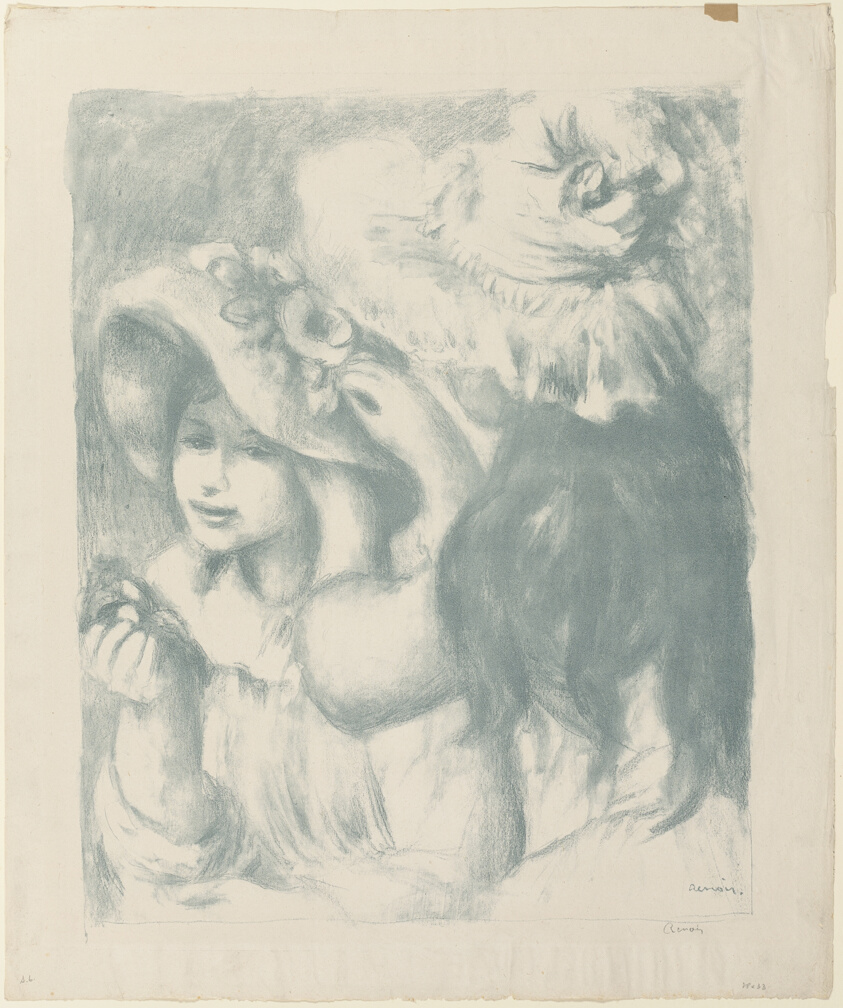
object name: Print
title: The Pinned Hat, second plate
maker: Pierre Auguste Renoir (French, 1841-1919); printed by Auguste Clot (French, 1858-1936)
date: c. 1898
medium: Lithograph from one stone in blue-gray on gray chine tipped at corners and margins to mat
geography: France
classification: lithograph; print; prints and drawing